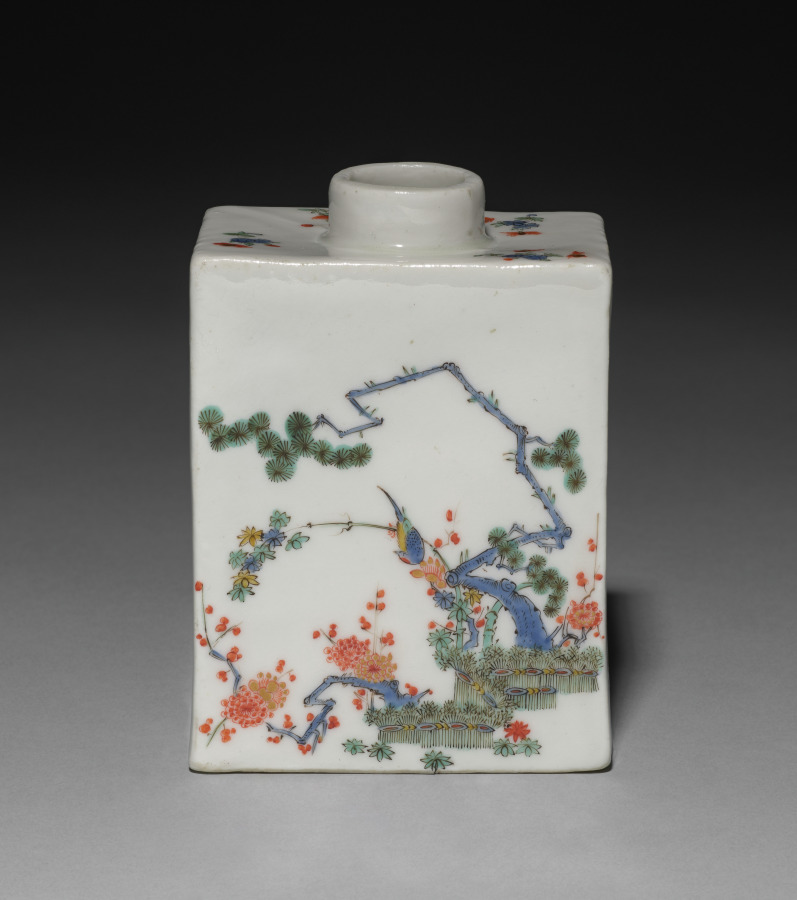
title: Tea Caddy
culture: Germany, Meissen, 18th century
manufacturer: Meissen Porcelain Factory (German, est. c. 1710)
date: c. 1735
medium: porcelain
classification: Ceramic